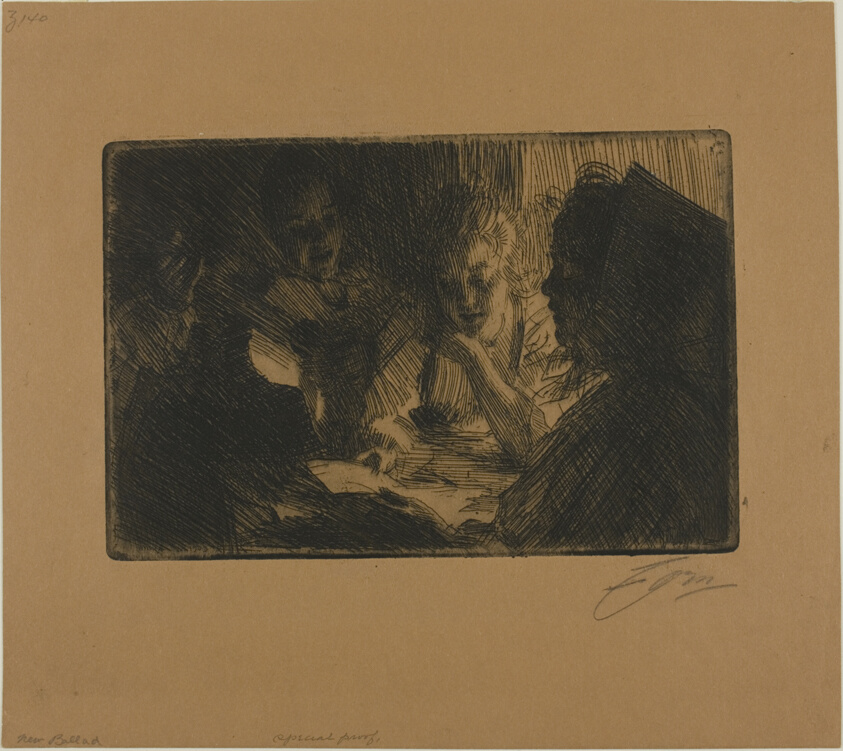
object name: Print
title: The New Ballad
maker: Anders Zorn (Swedish, 1860-1920)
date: 1903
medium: Etching on red-brown paper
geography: Sweden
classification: etching; print; prints and drawing